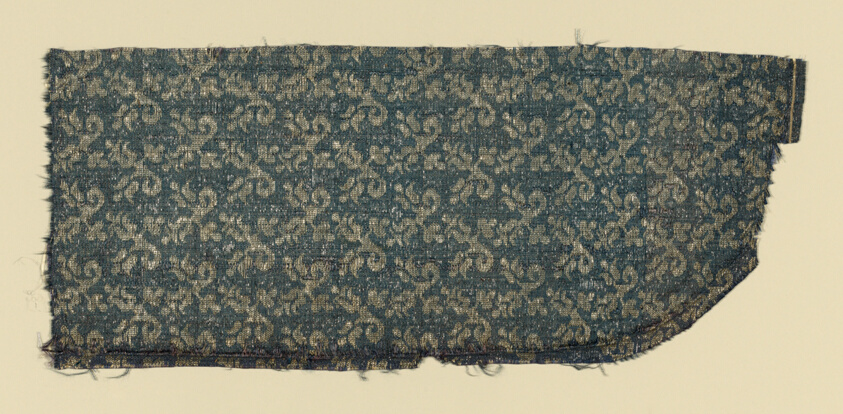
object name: Textile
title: Fragment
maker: Italy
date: 1625/75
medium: Silk and gold gilt strips, plain weave with supplementary patterning wefts; shades of blue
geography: Italy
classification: textile; weaving